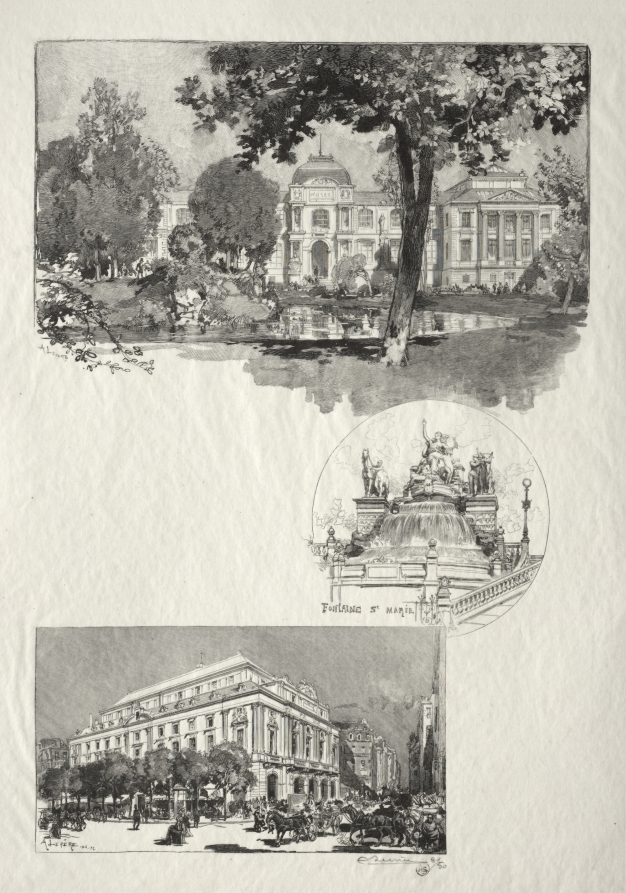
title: Rouen Illustré: La Musée; Fontaine St. Marie; Le Théâtre des Arts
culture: France, 19th century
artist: Auguste Louis Lepère (French, 1849–1918)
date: 1896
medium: wood engraving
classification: Print